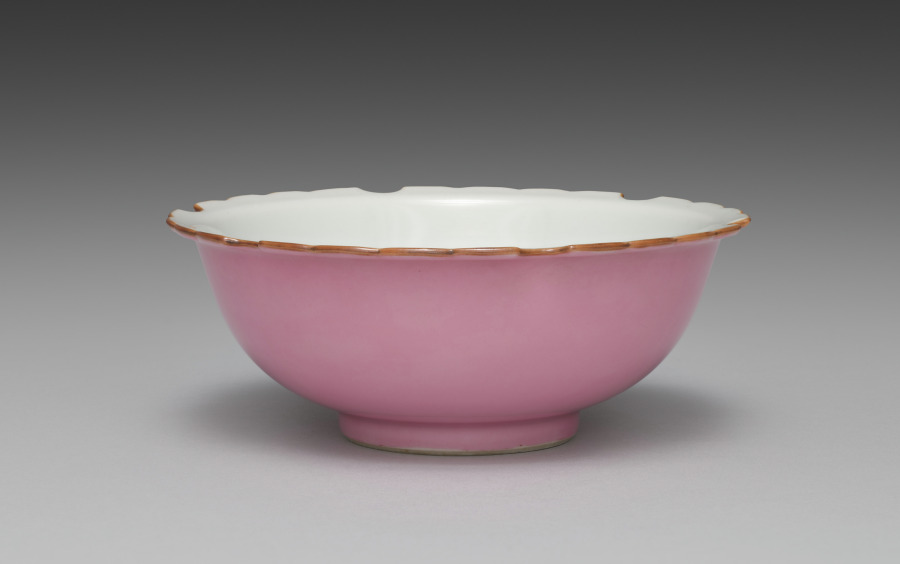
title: Dish from Snow-Flake Side Dishes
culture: Japan, Meiji period (1868–1912)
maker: Seifū Yohei III (Japanese, 1851–1914)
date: 1893–1914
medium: One from a set of six porcelain dishes; porcelain with lobed rims and pink glaze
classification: Ceramic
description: According to the box lid, this set of six side dishes, or mukōzuke, are “snow-flower style” (sekkashiki), having mouths shaped like snowflakes. Their mouths, which have six lobes and scalloped edges, are traced with brown iron oxide at the rim. The outside of each bowl is glazed with a very bright pink over the basin and foot, and the inside is left white. From directly above, one sees a snowflake-like shape, and from the side, they seem to float above a rosy ground.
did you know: The box for this set of dishes has an inscription on the side noting that they were for a person with the family name Nakamoto.